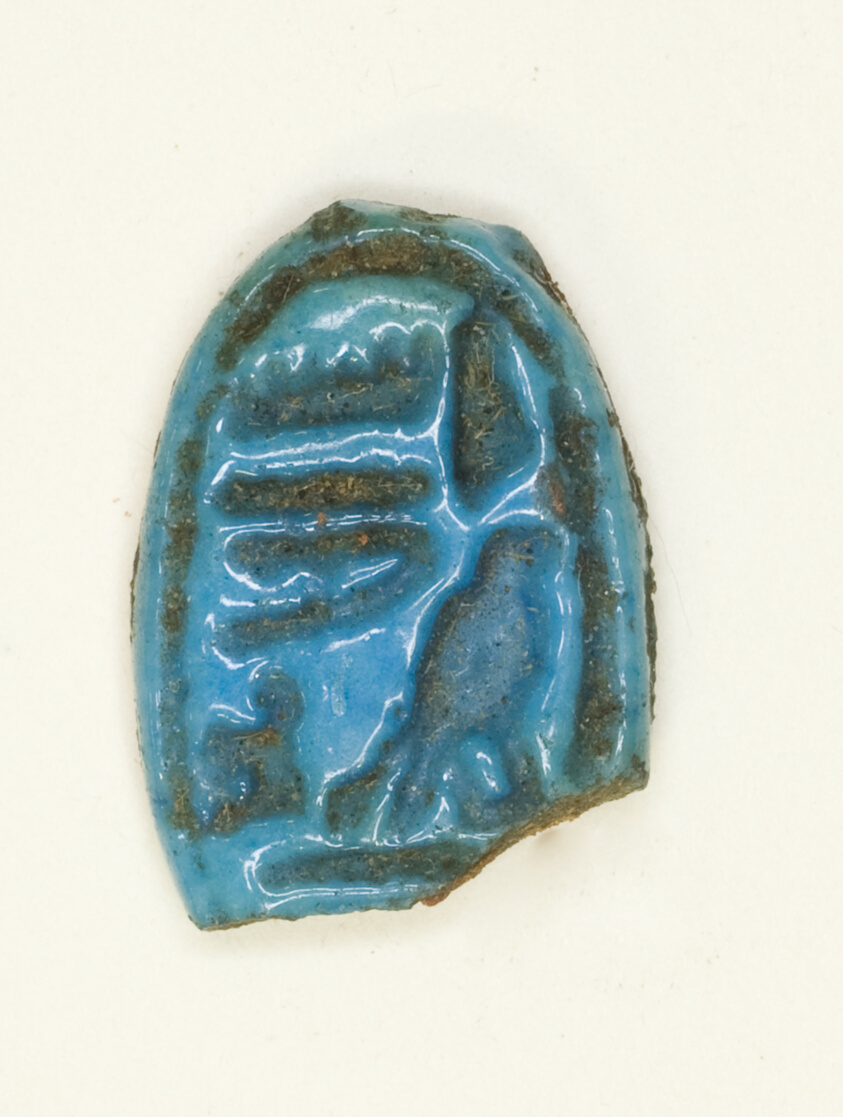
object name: Costume and Accessories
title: Ring: Horem[heb], Beloved of Amon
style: eighteenth dynasty, new kingdom, egyptian, ancient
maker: Egyptian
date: New Kingdom, Dynasty 18, reign of Horemheb (about 1323–1295 BCE)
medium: Faience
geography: Egypt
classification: ring (jewelry); ceramics; jewelry; ancient art; costume; faïence (composite material)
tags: Hieroglyphs